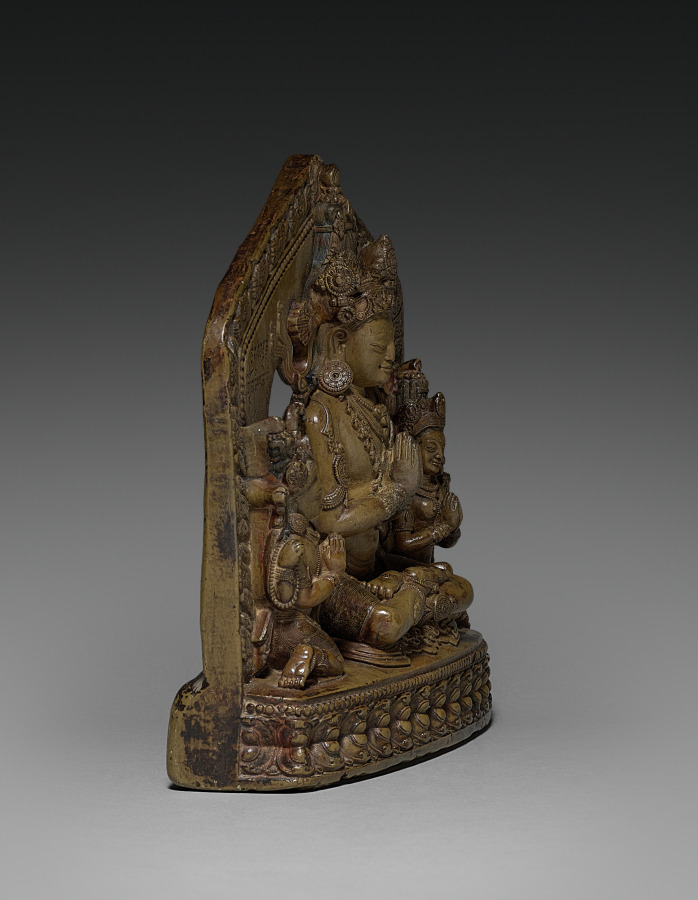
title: Stele with Sadaksari-Lokesvara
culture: Tibet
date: c. 1200s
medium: Kaolin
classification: Sculpture